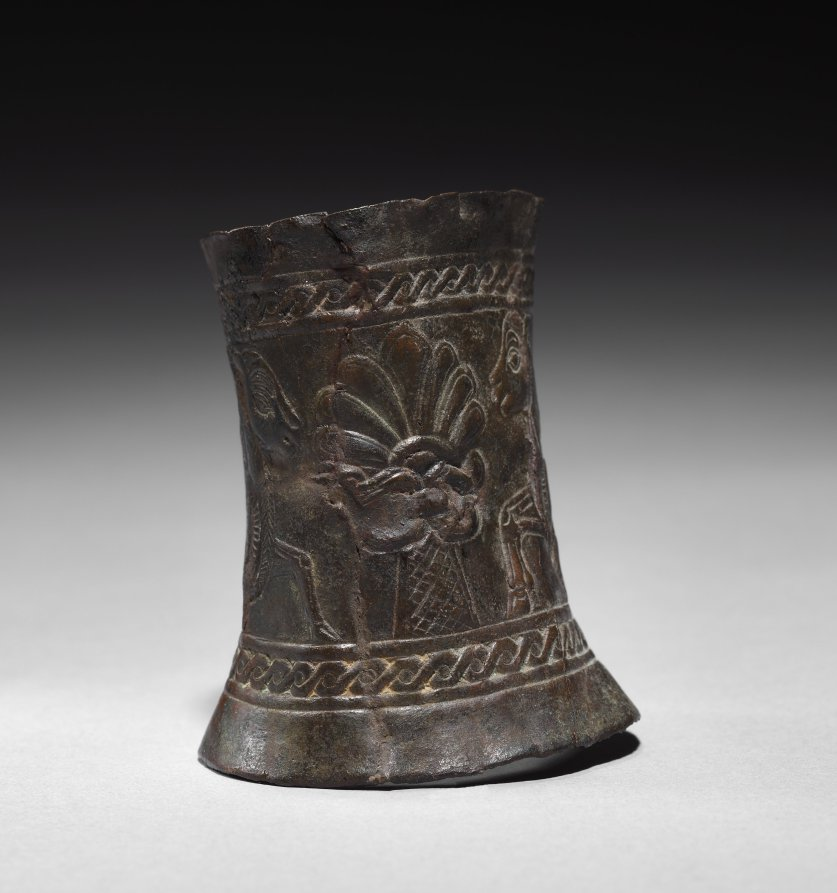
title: Decorated Cylinder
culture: Iran, Mannaean, Ziwiye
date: c. 1000–800 BCE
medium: bronze, repoussé and incised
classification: Metalwork